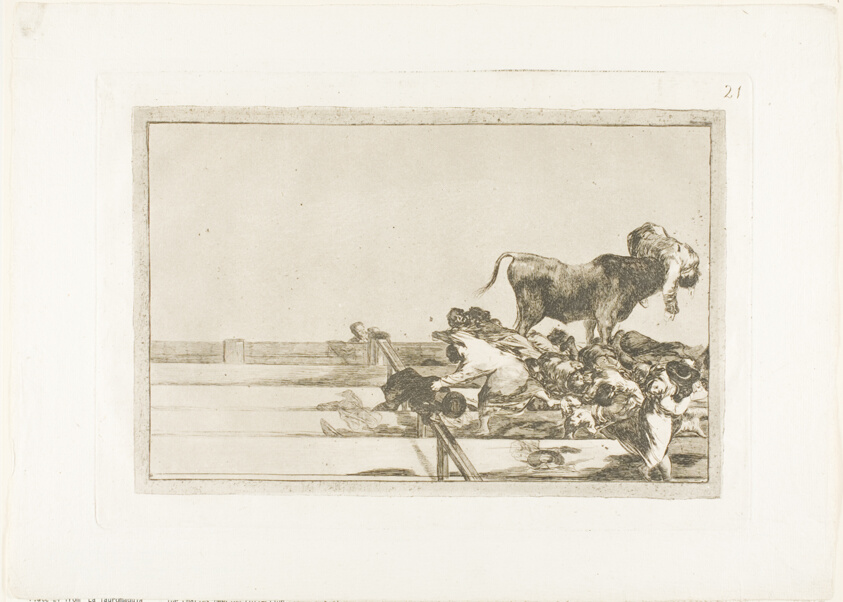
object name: Print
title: Dreadful events in the front rows of the ring at Madrid, and death of the mayor of Torrejón, plate 21 from The Art of Bullfighting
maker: Francisco José de Goya y Lucientes (Spanish, 1746-1828)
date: 1814/16, published 1816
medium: Etching, burnished aquatint, lavis, drypoint and burin on ivory laid paper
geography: Spain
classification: etching; print; prints and drawing